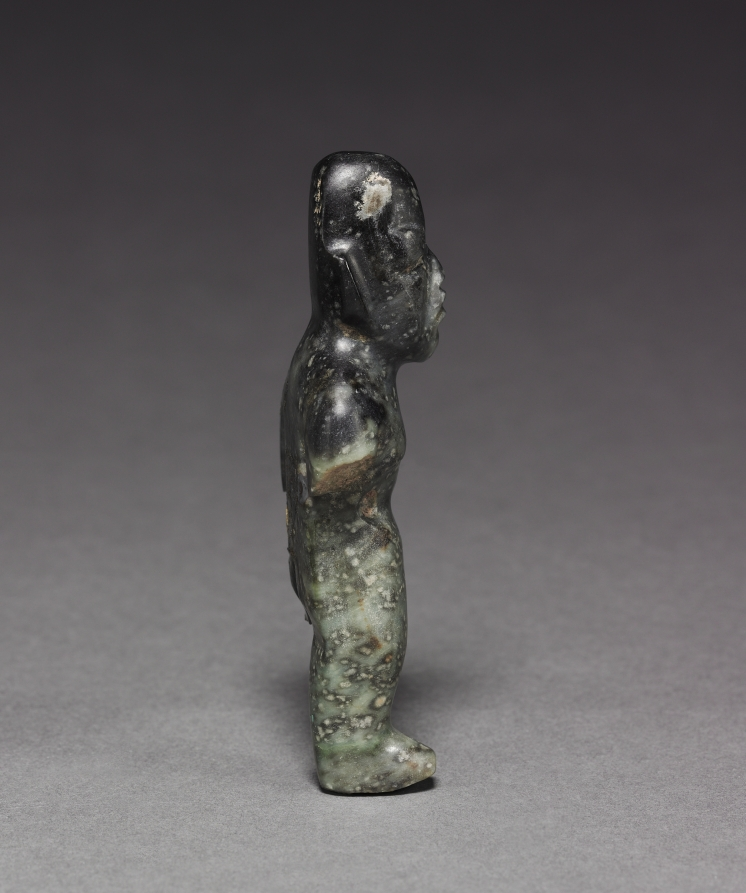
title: Figurine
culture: Mesoamerica, Mexico, Olmec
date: 1200–300 BCE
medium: jadeite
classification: Jade